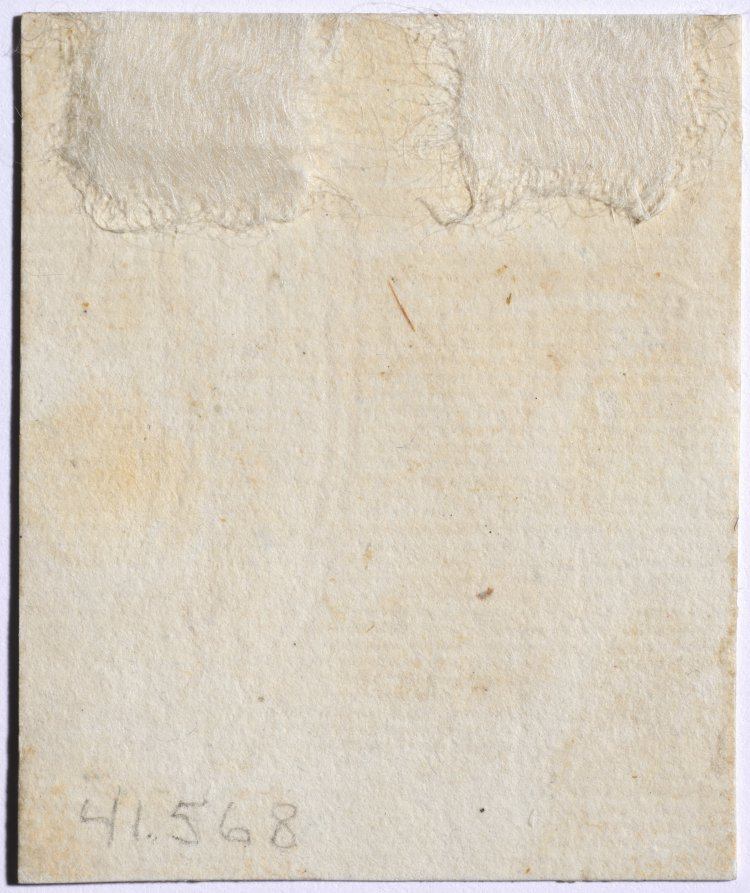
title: Portrait of a Woman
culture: England, 18th century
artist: John I Smart (British, 1741–1811)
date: c. 1775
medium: graphite and wash on laid paper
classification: Portrait Miniature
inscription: inscribed on paper backing in graphite, upside down, at upper right: 139; also on paper backing in graphite on slant at lower right corner: La belle/Gabrielle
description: Although it is impossible to say if it was always part of the artist’s process to execute a preparatory sketch prior to painting each miniature, we do know that John Smart retained many hundreds of these sketches. A group of preparatory sketches—of which this portrait is one—descended through the Smirke family after Smart’s daughter Sarah gave a sketchbook containing preparatory portrait studies to her friend Mary Smirke, sister of the celebrated Victorian architect Sydney Smirke. This book was probably broken up around 1877 when it was divided between Sydney’s daughters Mary Jemmett and Mrs. Lange, whose portions were both sold at auction in 1928. This portrait was assigned the historically colorful but fictitious title of “La Belle Gabrielle” at some point after memory of its true identity had been lost. Giving illustrious titles to portraits of unknown sitters was a popular strategy adopted by dealers during the nineteenth and twentieth centuries, often applied to miniature portraits and, in particular, to Smart’s sketches of women. The inscription on the paper backing is not in Smart’s hand, and when the paper backing was removed in 1993, no inscriptions were discovered on the back of the drawing itself. Only the sitter’s head and neck are drawn, and a low-necked dress is faintly suggested. Her head is turned to the right, and her light-colored hair is dressed high, with flat curls against the back of her head. She has brown eyes, and the color of her lips is extremely faded, though the hint of a ruddy complexion remains. Her sagging jaw line and the lines beneath her eyes suggest that this sitter was painted as a mature woman. The background is unpainted. To this date, the finished ivory for which this preparatory sketch was presumably undertaken has not been discovered.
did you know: Sketches helped John Smart work out the particulars of a portrait before commencing the miniature on ivory; they were useful in the event that a duplicate might later be required.